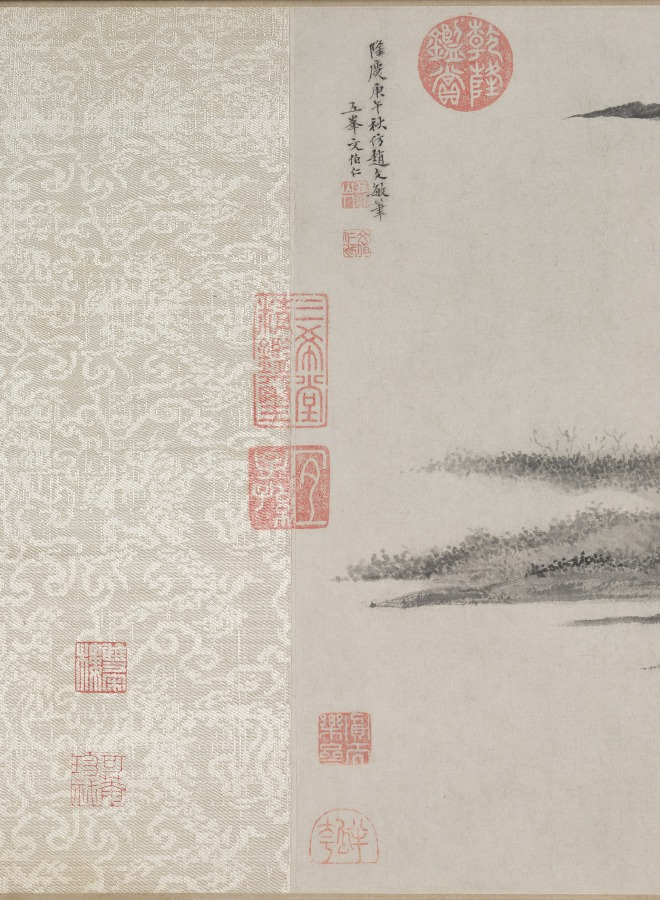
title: Water Village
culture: China, Ming dynasty (1368–1644)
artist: Wen Boren (Chinese, 1502–1575)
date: 1570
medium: handscroll; ink and light color on paper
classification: Painting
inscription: 隆慶庚午秋仿趙文敏筆. 五峰文伯仁 [印] 五峰山人; 文伯仁印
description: In the autumn of 1570, Wen Boren painted this seemingly unemotional scene of low-lying marshlands with a chain of rounded mountains in the background. A fishing boat is nestled on the shore near the village. Although paths and bridges traverse the landscape, only two people are visible in the stillness. From the restrained atmosphere of this landscape, one would never guess that Wen Boren was known as the “bad boy” of the Wu School for his explosive temper. As a younger man, he was even embroiled in a contentious lawsuit with his own uncle, Wen Zhengming (1470–1559), a master of Ming dynasty painting with whom he had trained. The ideal of the scholar-painter, or literati, was that an artist’s moral character is reflected in his paintings, so there was great incongruity between Wen Boren’s difficult personality and his restrained landscapes. A contemporary, Wang Shizhen, wrote this about him: "This gentleman is prone to behave odiously and screamed accusations at people. How is it possible for him to carry in his bosom such a wealth of scenic wonders?" Who knows what effort it took to subdue his fractious spirit to project an image of coolness and refined taste in his paintings?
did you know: A foreground tree has an eccentric twisting silhouette and pepper-dot "halo" of leaves.